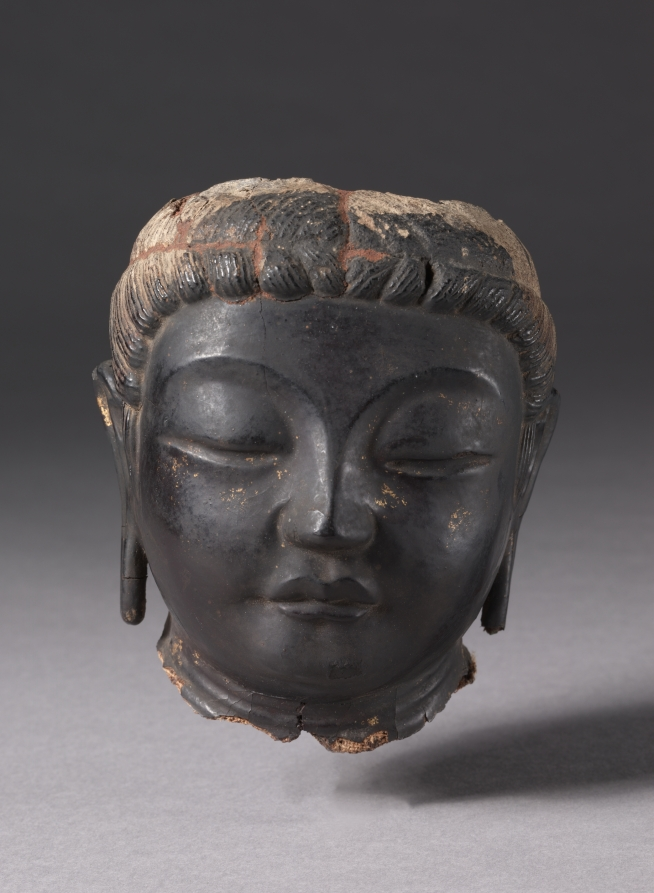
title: Head of Bodhisattva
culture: Japan, Nara period (710–94)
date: 700s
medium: dry lacquer with traces of gilding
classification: Sculpture